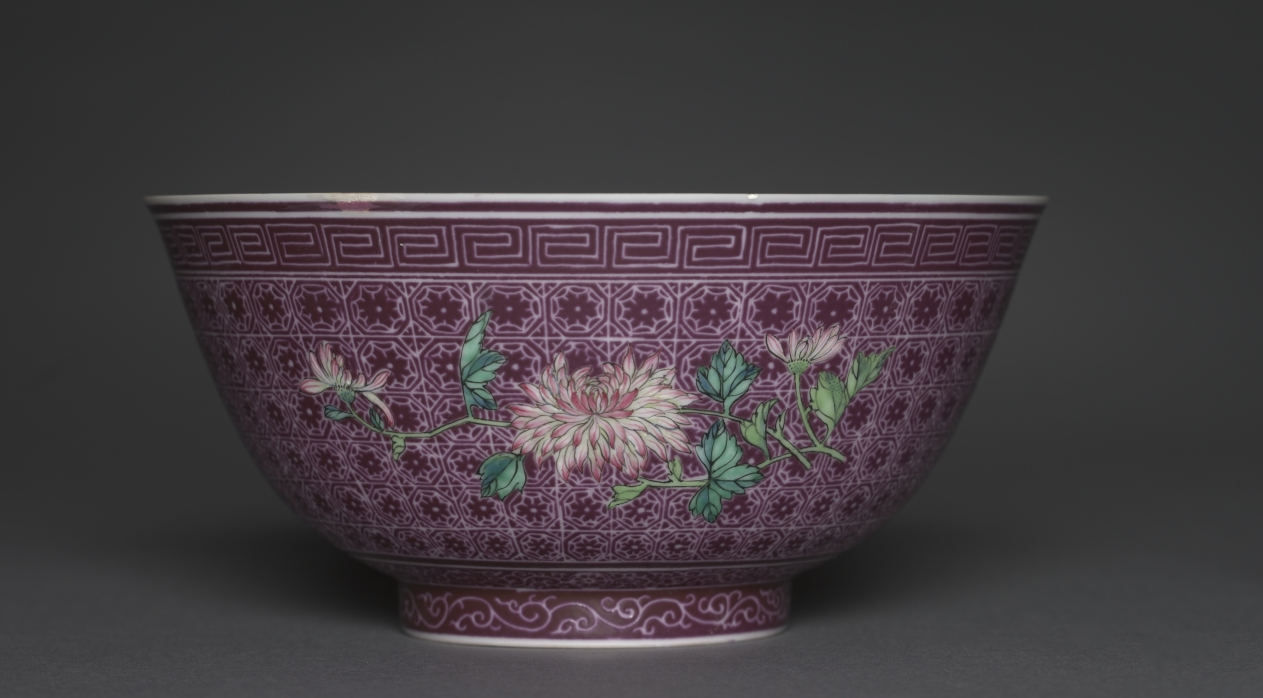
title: Bowl with Peony Sprays on Diaper Ground (exterior); Chrysanthemum Sprays (interior)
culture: China, Jiangxi Province, Jingdezhen, Qing dynasty (1644–1911), Qianlong mark and reign (1736–95)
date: 1736–95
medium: porcelain with famille rose overglaze enamel decoration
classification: Ceramic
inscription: 乾隆年製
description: The production of extraordinarily refined Qing imperial wares such as these could have involved the transportation of undecorated, plain porcelains from the imperial kilns in Jingdezhen, Jiangxi province, to the palace workshops in Beijing, where court painters applied the polychrome enamel decoration. The Qianlong reign mark on the base of the bowl is written with blue enamel over the transparent glaze.